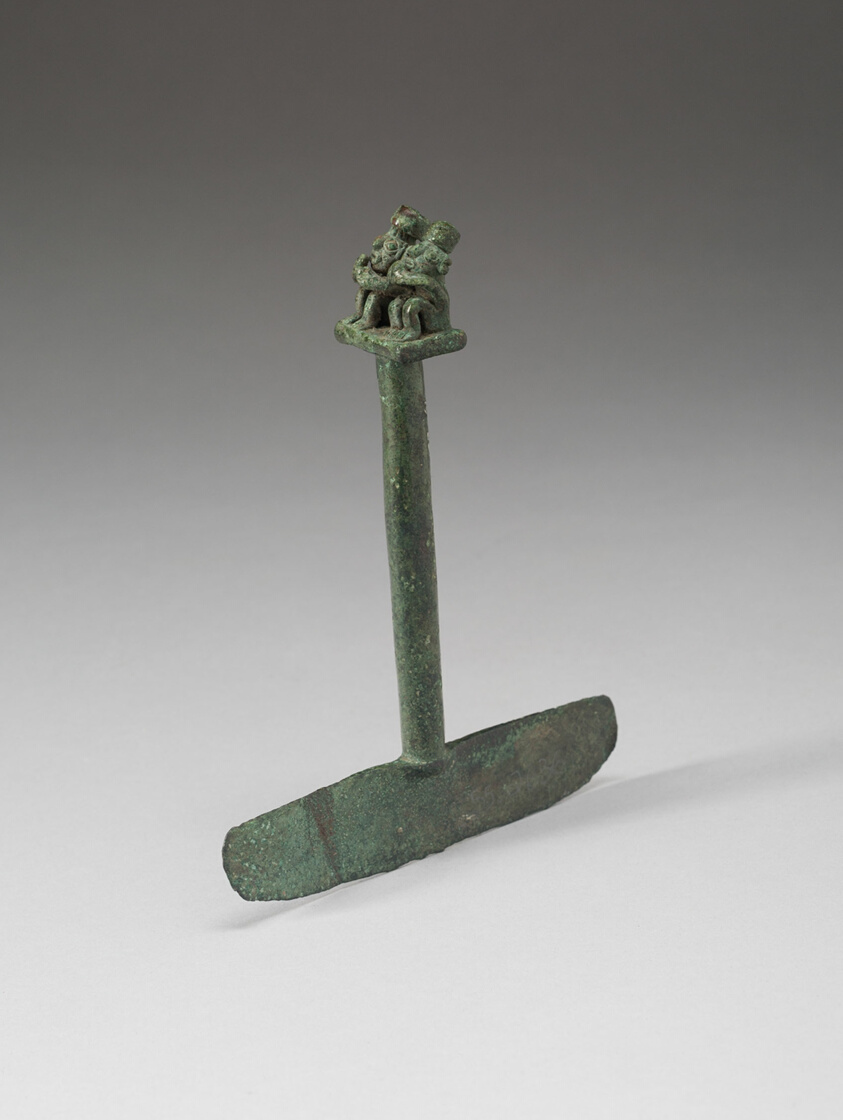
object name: Decorative Arts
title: Wide-Blade Knife with Two Seated Figures on Top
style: inca, south american, andes, 21st Century, Arts of the Americas, andean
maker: Inca (South coast or central highlands, Peru)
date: 1440–1540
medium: Copper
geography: Alti Plano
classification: metal; american decorative arts; tool; art of the americas; decorative arts